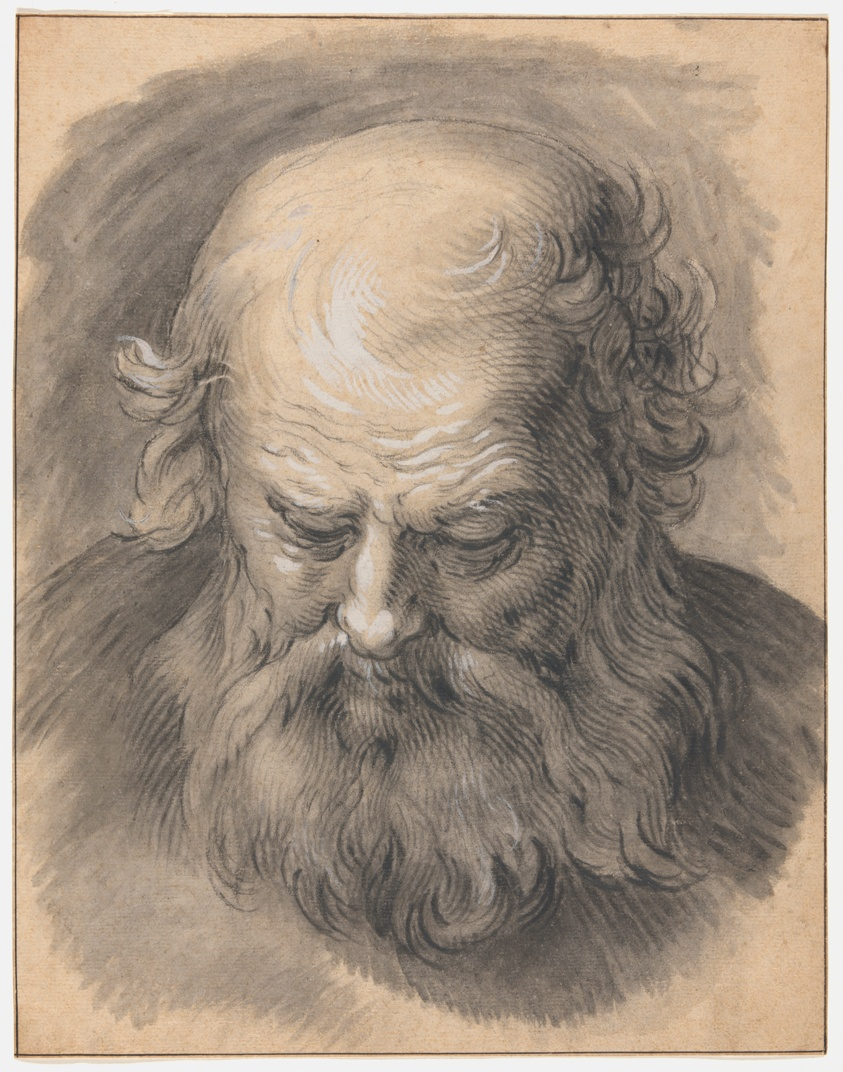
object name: Drawing and Watercolor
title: Study of the Head of a Bearded Man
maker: Abraham Bloemaert (Dutch, 1566-1651)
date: 1595/1605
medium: Black chalk, with brush and black chalk wash, heightened with opaque white watercolor, over touches of charcoal, on tan laid paper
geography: Holland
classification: ink or chalk wash; drawings (visual works); prints and drawing